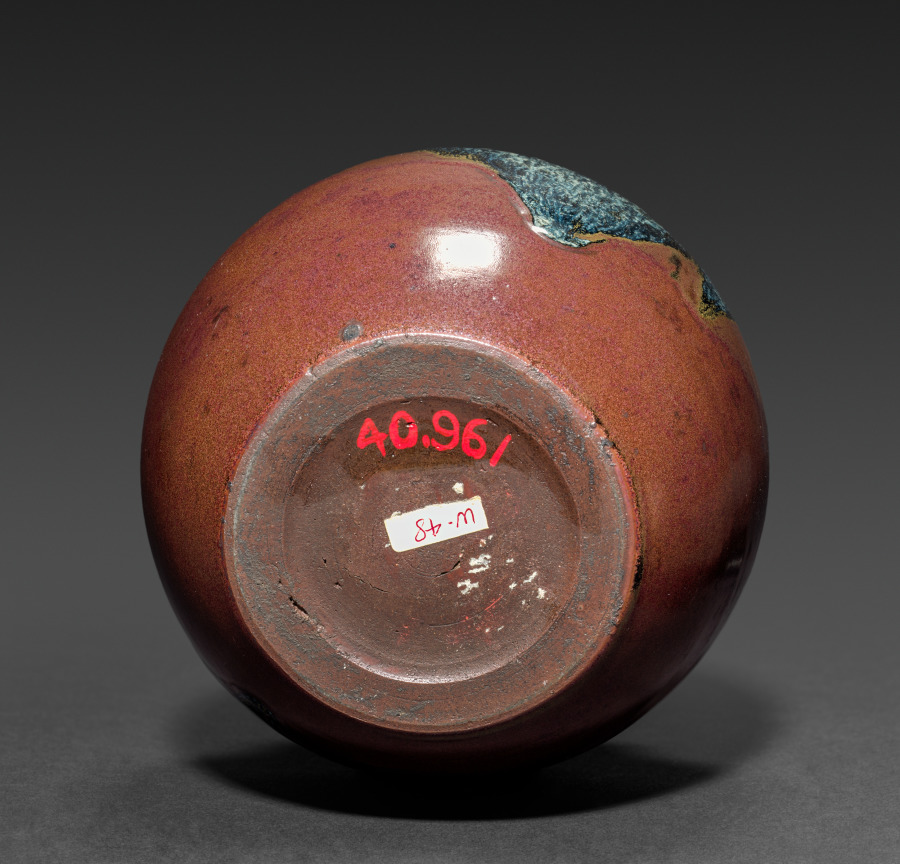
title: Jar with Wooden Cover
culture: Japan, Edo period (1615–1868)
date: 1700s-1800s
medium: pottery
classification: Ceramic